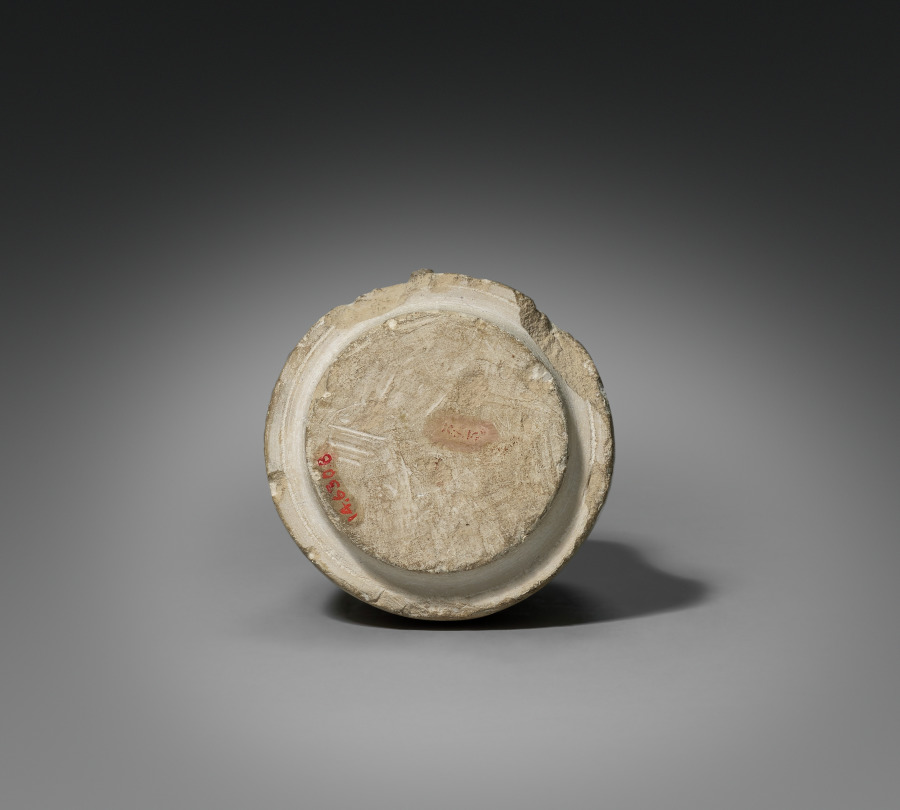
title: Canopic Jar with Lid (lid)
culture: Egypt, New Kingdom (1540–1069 BCE), Dynasty 18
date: 1540–1296 BCE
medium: limestone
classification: Funerary Equipment